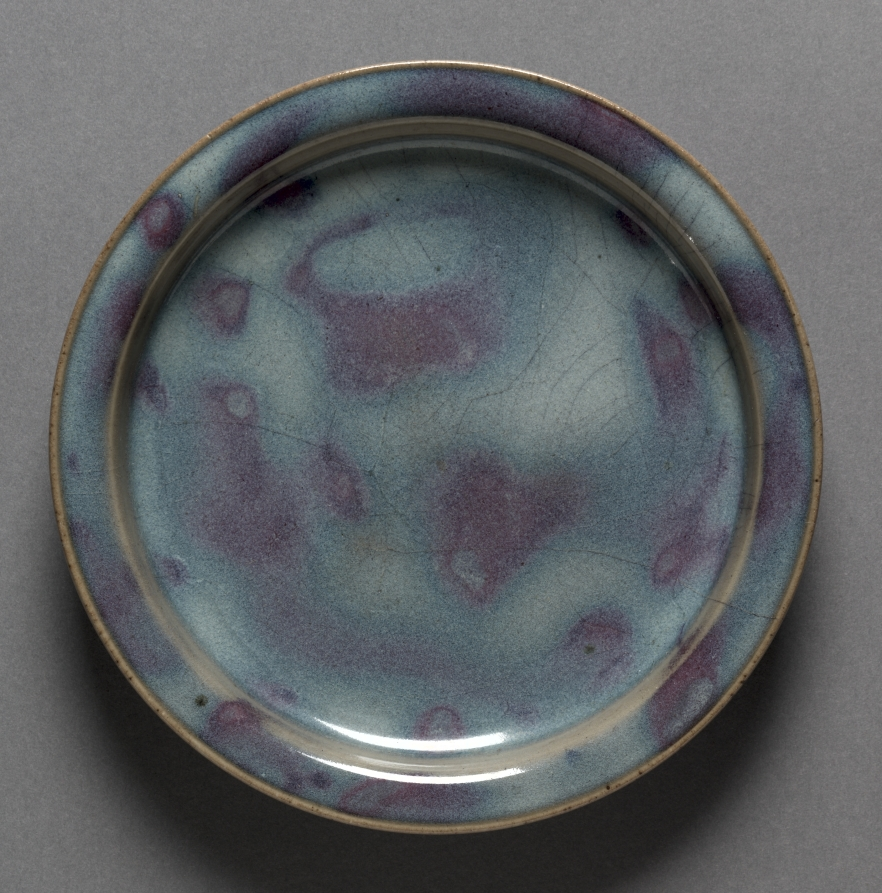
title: Plate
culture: Northern China, Northern Song dynasty (960-1127) - Jin dynasty (1115-1234)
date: 1100s–1200s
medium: Stoneware with mottled glaze, Jun ware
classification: Ceramic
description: This shallow plate's light gray stoneware body is covered with a thick glaze of intense robin's egg blue suffused with deep amethyst patches.